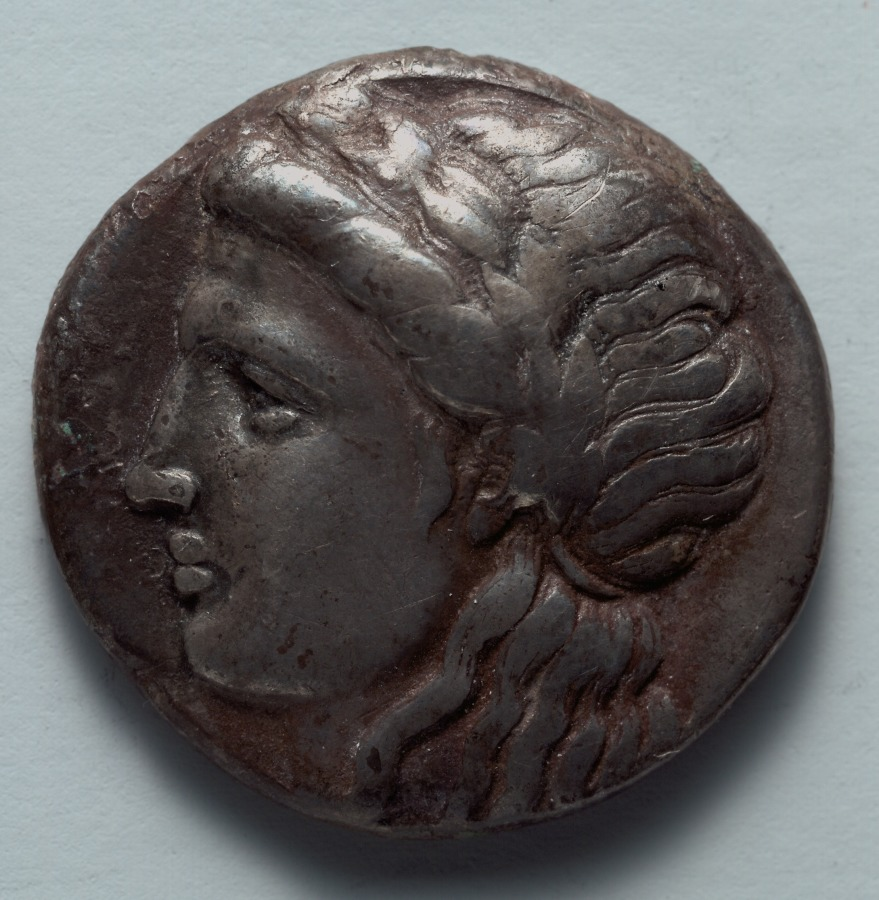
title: Tetradrachm: Head of Apollo (obverse); Lion (reverse)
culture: Greek, minted at Miletos (Ionia)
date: c. 334–323 BCE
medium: silver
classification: Coins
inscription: ΑΡΤΕΜΩ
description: The lion, king of the beasts and an animal associated with regal and heroic power, featured prominently on the coinage of many ancient Greek city-states. Artists placed the lion in a variety of poses, sometimes including the whole body, at other times the foreparts or just the head. Although it may once have roamed nearby, for many Greeks the lion was a monster nearly as exotic as the Chimaera, of which it formed a part, together with a goat head and snake-headed tail.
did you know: The lion and star on the reverse connect to the sun god, Apollo, on the obverse.